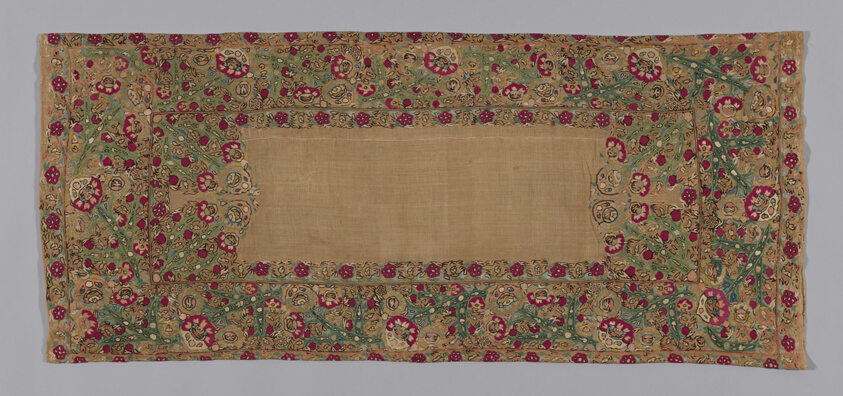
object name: Textile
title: Cushion Cover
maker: Greece, Epirus Province or Ionian Island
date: 18th century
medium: Linen, plain weave; embroidered with silk in closed herringbone, satin, stem, and twined double running stitches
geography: Greece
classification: textile; needlework (visual works)